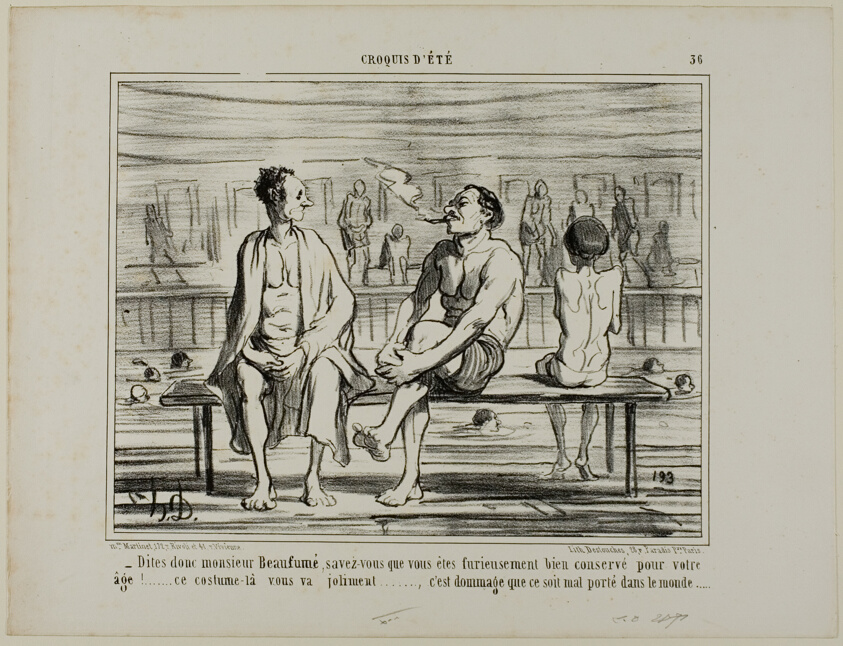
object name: Print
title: “You know, Monsieur Beaufumé, actually you have kept damned well considering your age. This costume suits you perfectly.... just too bad that it does not look good on everybody,” plate 36 from Croquis D'été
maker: Honoré Victorin Daumier; French, 1808-1879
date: 1858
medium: Lithograph in black on off-white wove paper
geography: France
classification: lithograph; print; prints and drawing